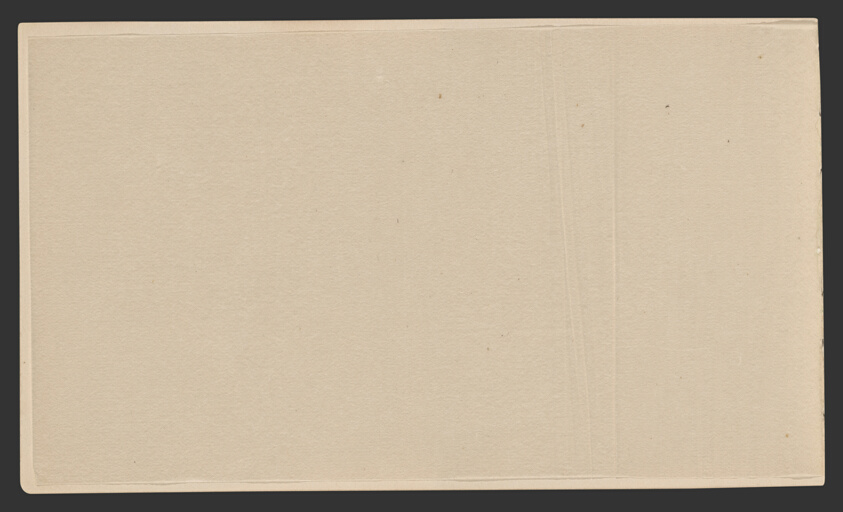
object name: Drawing and Watercolor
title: Sketchbook No. 2 (L'Estaque)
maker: Paul Cézanne; French, 1839-1906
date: 1875–86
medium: Graphite and pen and ink drawings on paper, bound into a book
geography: France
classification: sketchbook; graphite; prints and drawing; paper